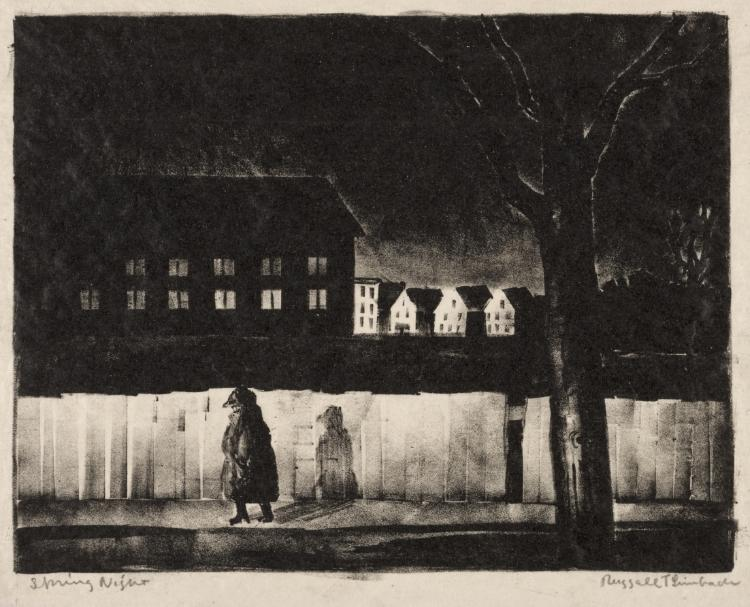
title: Spring Night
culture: America, Ohio, Cleveland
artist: Russell T. Limbach (American, 1904–1971)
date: c. 1928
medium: lithograph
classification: Print